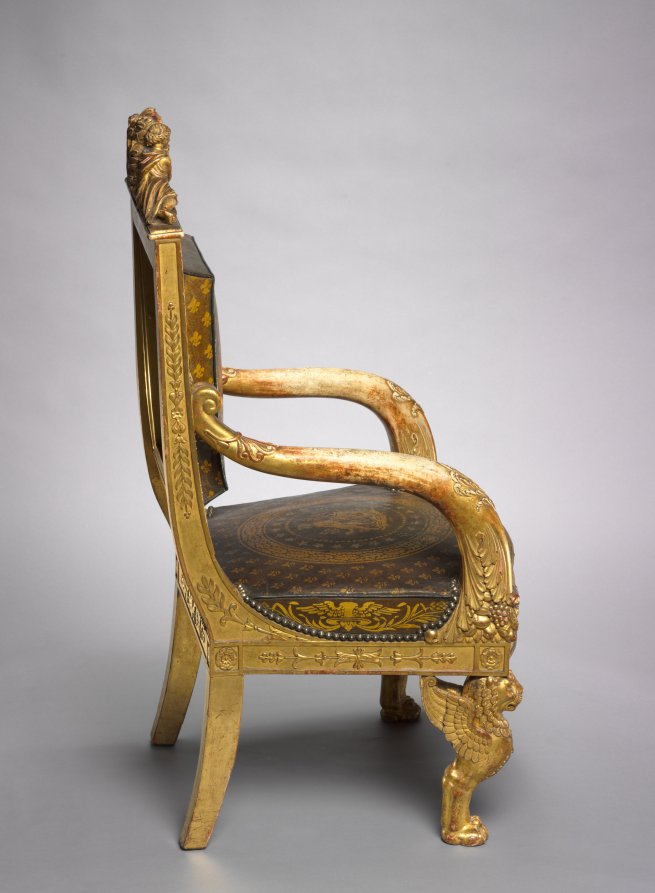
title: Child's Throne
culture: France, Paris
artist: Pierre-Marie Balny le Jeune (French, 1832)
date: 1822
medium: carved and gilded wood, leather upholstery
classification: Furniture and woodwork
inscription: inscribed with stencils inside back rail: BLONDEL TAPISSIER/RUE ST. ANTOINE N 72 1822 inscribed in ink lower edge back rail: 12 JANVIER 18[22?]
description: This chair was made for the young, presumed successor to the French throne who ruled briefly as Henri V in 1830, the last of the direct Bourbon line. He is depicted at the center of the top rail protected by female figures representing France and Minerva, the Roman goddess of wisdom. Fleurs-de-lis and the Gallic rooster, symbols of French royalty and the French people, decorate the upholstery.